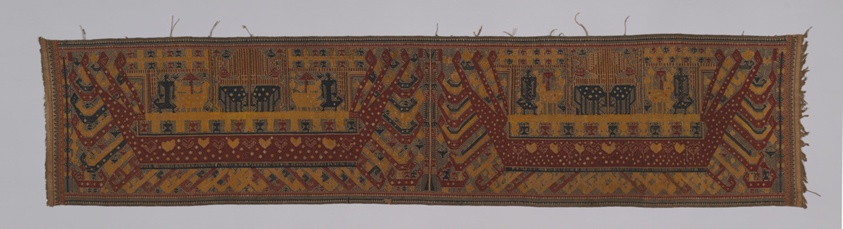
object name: Religious/Ritual Object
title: Ceremonial Hanging (palepai)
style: indonesian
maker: Paminggir people; Indonesia, South Sumatra, Lampung area, Kalianda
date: 19th century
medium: Cotton, silk, and silver-leaf-over-lacquered-paper-strip-wrapped bast fiber (probably ramie), plain weave with supplementary patterning and brocading wefts, main warp fringe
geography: Indonesia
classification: textile; weaving; ritual objects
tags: boats, figures (representations), seas, waves